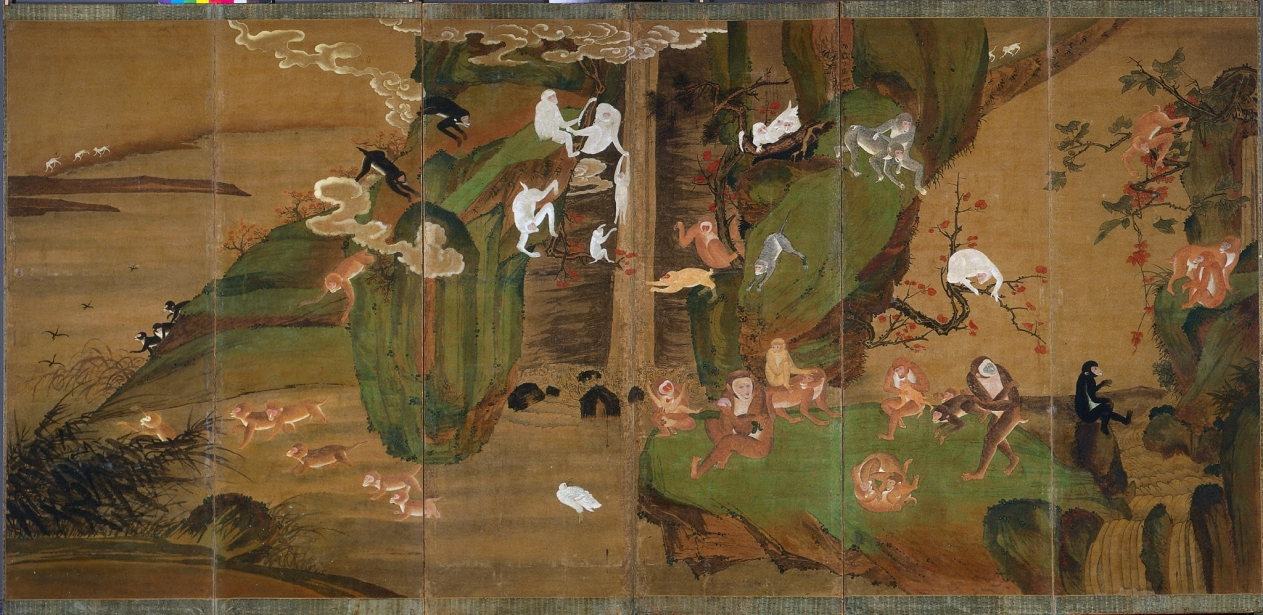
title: Gibbons in a Landscape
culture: Korea, Joseon dynasty (1392–1910)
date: early 1900s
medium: Six-panel folding screen; ink and color on hemp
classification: Painting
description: In this folding screen, gibbons playfully interact with each other. In Korean paintings, gibbons were less frequently depicted than in their Chinese and Japanese counterparts. However, they became popular toward the end of the 1800s, possibly due to an influx of Chinese and Japanese decorative arts. Gibbons symbolize good fortune, but as paired with the red autumn foliage, specifically refer to professional success, such as passing the government examination and getting promoted to a higher position. The large ripe peach held by one gibbon bears another symbolic meaning: prosperity and longevity.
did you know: Gibbons were often presented to the Joseon royal court as diplomatic gifts from the Japanese government.